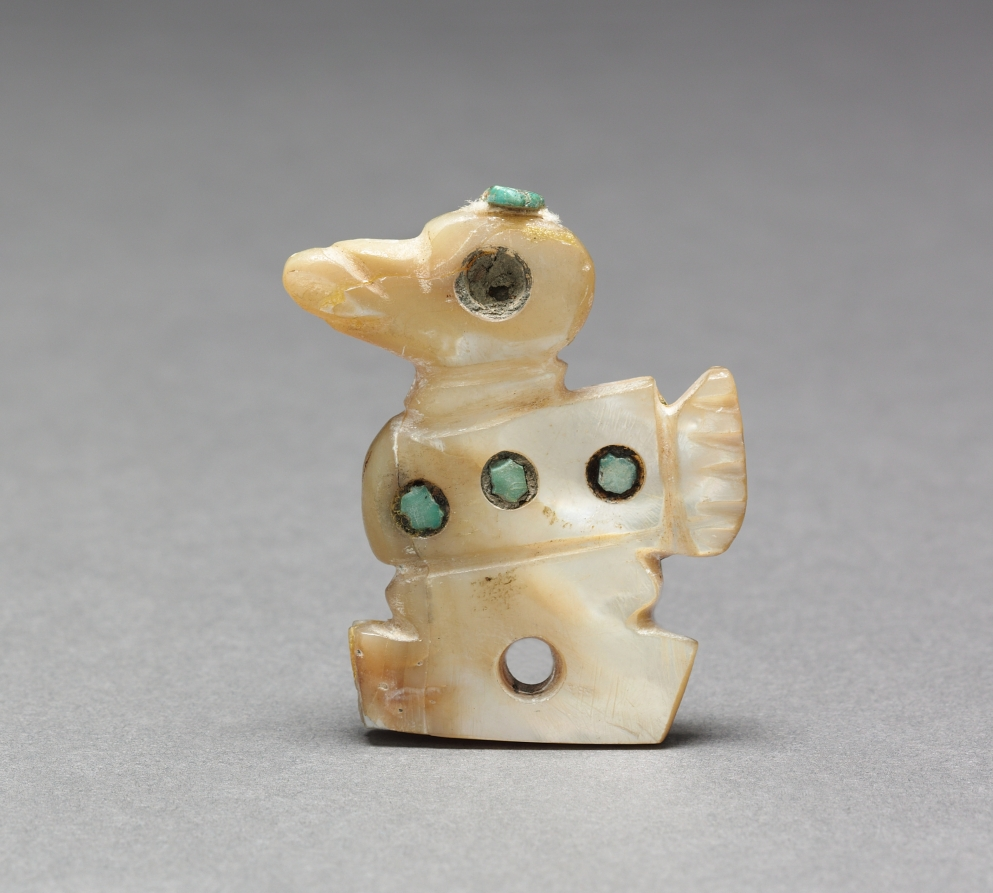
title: Bird Ornament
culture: North coast of Peru, Cupisnique style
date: c. 900–600 BCE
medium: shell with stone inlay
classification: Jewelry